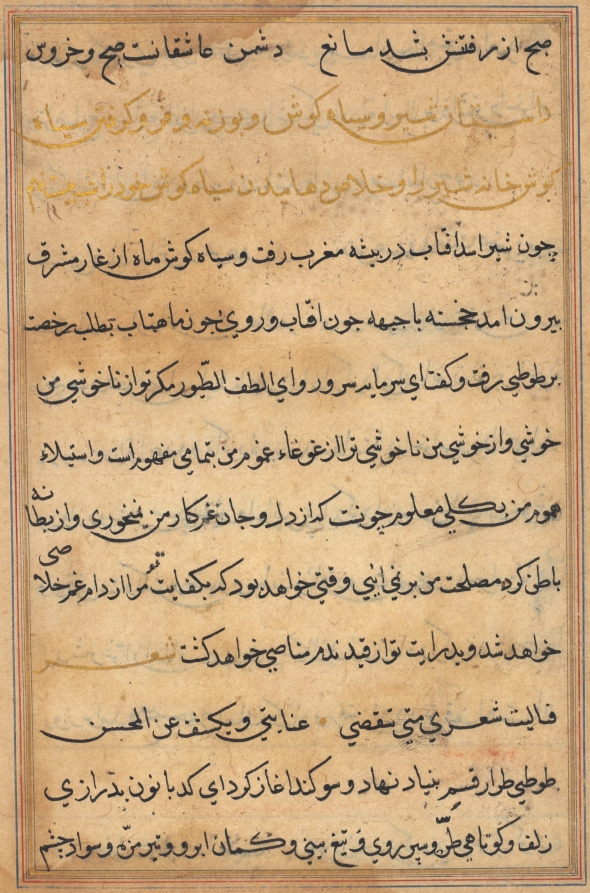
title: Page from Tales of a Parrot (Tuti-nama): text page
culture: Mughal India, court of Akbar (reigned 1556–1605)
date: c. 1560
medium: gum tempera, ink, and gold on paper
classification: Painting